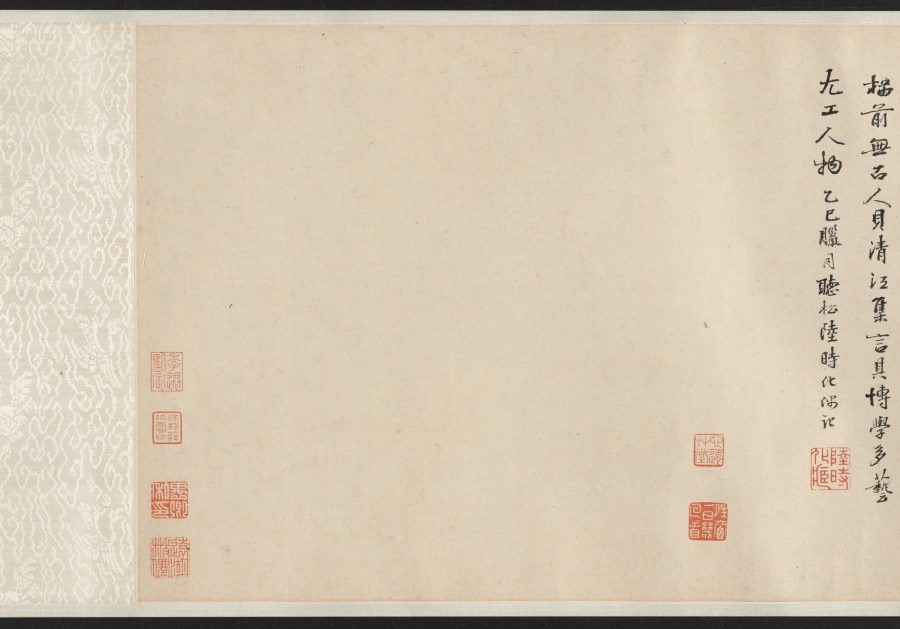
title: Nine Songs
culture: China, Yuan dynasty (1271-1368)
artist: Zhang Wo (Chinese, active c.1336–after 1364)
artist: Chu Huan (Chinese, active 1361)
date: 1361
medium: handscroll; ink on paper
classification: Painting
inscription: 7 colophons and 47 seals: 1 colophon, dated 1361, and 28 seals of Chu Huan 褚奐 (active c. 1361); 1 colophon, dated 1785, and 1 seal of Lu Shihua 陸時化 (1714-1779); 2 seals of Lu Yü-ch'ing (18th c.); 1 colophon, dated 1935, of Ye Gongchuo 葉恭綽 (1881-1968); 1 colophon, dated 1935, of Wu Hufan 吳湖帆(1894–1968); 1 colophon, dated 1938, and 1 seal of Wang Tongyu 王同愈 (1856-1941); 1 colophon, dated 1941, of Wu Huayuan 吳華源 (1893-1972); 1 colophon, dated 1942, and 9 seals of Xu Bangda 徐邦達 (1911–2012); 1 colophon, dated 1942, of Lang Jingshan 郎靜山 (1892-1995); 1 colophon, dated 1944, of Tang Yun 唐雲 (1910-1993); 6 seals of Wang Jiqian [C.C. Wang] 王季遷 (1907–2003).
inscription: Text of The Nine Songs written by Chu Huan at the end of each section.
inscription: 右離騷九歌圖，宋龍溟居士李公本，淮南張渥叔厚所畫妙絕當世。家藏請予書其辭目識于左。至正二十一年辛醜三月旦河南褚奐記。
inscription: Colophon by Lu Shihua 陸時化 (1714–1789): This scroll is fortunate to have been handed down from collections of the right people. Now, after 500 years, its condition is as good as when it was painted. I acquired this from Mr. Shen Guiyu [1673-1769], the President of the Board of Rites. The label is in his handwriting when he was 95 years old. I submit that Chu Huan (t. Shiwen) of the Yuan Dynasty was a native of Qiantang. His "seal" and li writings are in the style of Wu Rui. For example, in [Chu Kuei's] Ming ji lu [A list of masterpieces] is recorded the stele commemorating the restoration of the prefectural school of Kun-shan, the text of which was composed by Yang Weizhen in the twenty-first year of Zhizheng [1361]; and the calligraphy as well as the title in li style was by Chu Huan, who was at that time an assistant judge of the prefecture of Haining in the circuit of Hangzhou. Zhang Wo's zi is Shuhou (叔厚). His literary name is Zhen Qisheng (贞期生). According to [Gu Ying's] Yu shan cao tang ya jii, he liked to paint in the bai-miao or the "pure delineation" style after the method of Li Longmian [Li Gonglin 李公麟], which finds no peer among the ancient masters. This is agreed upon [by Pei Ch'iung] in his Qing jiang zhi who praised [Zhang Wo] as being quite learned and well-versed in many branches of the arts, especially figure painting. Recorded by Lu Shihua [The mountain dweller], listening to the pine, in the twelfth month of the yisi year [1785].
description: Painted in the baimiao, or fine-line drawing style, this ancient work demonstrates the literati’s use of abstract calligraphic brushwork for self-expression. The subject of the “Nine Songs”—songs associated with shamanistic rituals in the ancient Chu kingdom—had traditionally provided artists with myths and legends that they could explore and reinterpret in their own works.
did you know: Divided into eleven sections, the scroll contains illustrations by painter Zhang Wu followed by a transcription of the relevant verse by calligrapher Chu Huan.